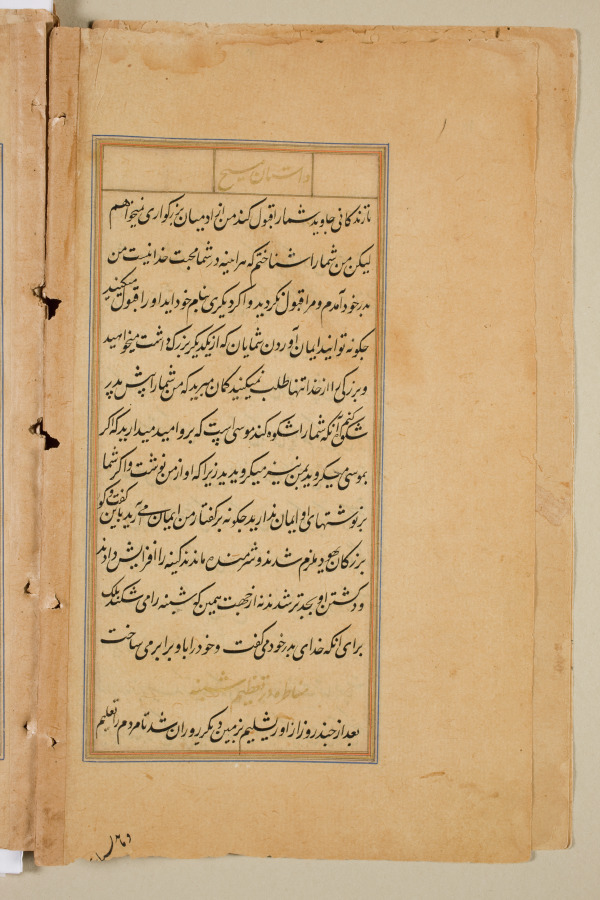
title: Text page from a Mirror of Holiness (Mir’at al-quds) of Father Jerome Xavier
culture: Mughal India, Allahabad, made for Prince Salim (1569–1627)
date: 1602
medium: Ink and gold on paper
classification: Manuscript